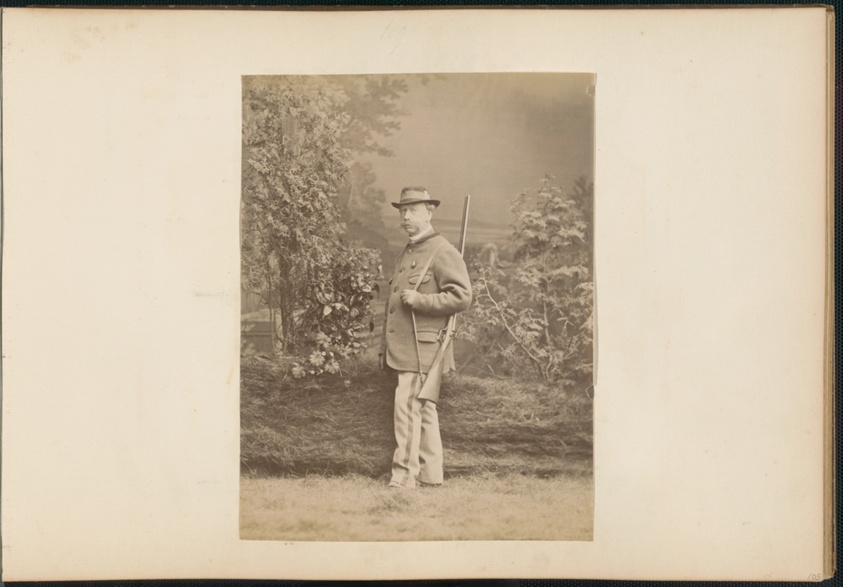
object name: Photograph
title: The Madame B Album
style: 19th century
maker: Marie-Blanche Hennelle Fournier (French, 1831–1906)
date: 1870s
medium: Albumen print (in album)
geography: France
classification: photograph; albumen silver print; photography